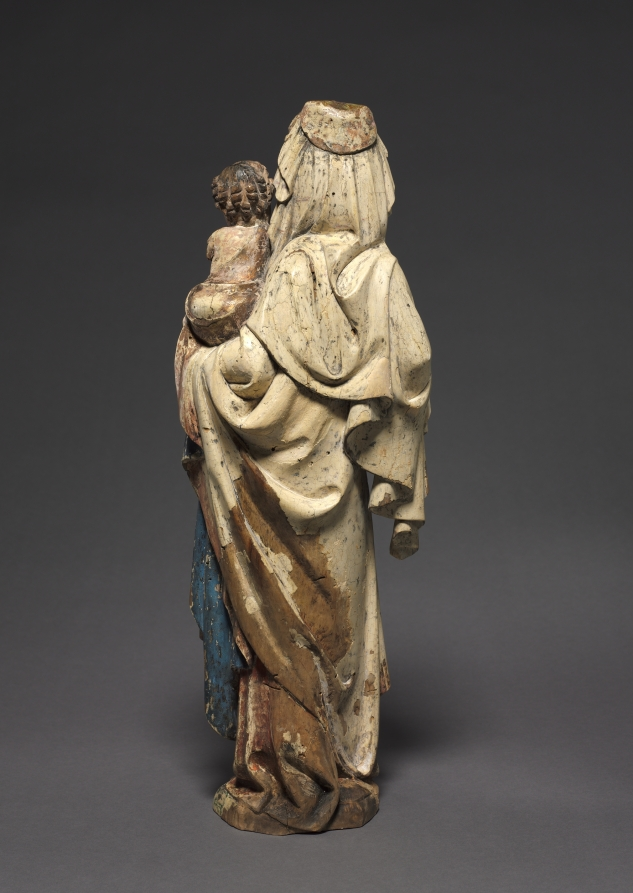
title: Virgin and Child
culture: Austria, Diocese of Passau, 14th century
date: c. 1370–1380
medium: painted lindenwood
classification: Sculpture